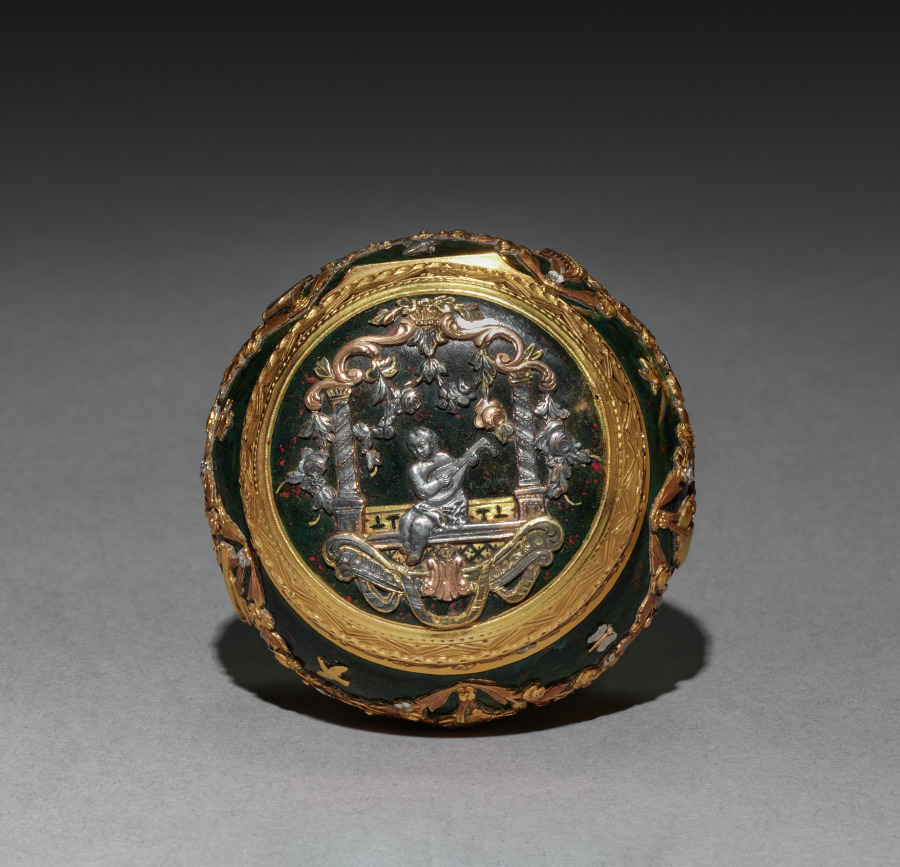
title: Bonbonniere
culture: France, 19th century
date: 1850–1899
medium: bloodstone (?) mounted in colored golds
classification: Miscellaneous